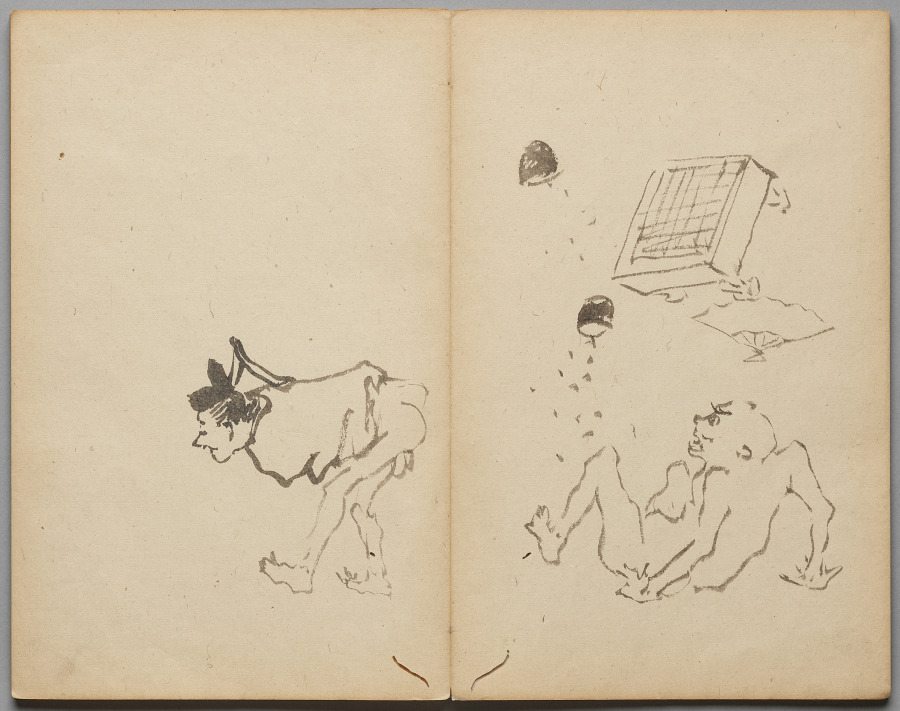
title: Farting Upsets a Game of Go from Sketch Album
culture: Japan, Edo period (1615–1868) to Meiji period (1868–1912)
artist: Kawanabe Kyōsai (Japanese, 1831–1889)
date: mid- to late 1800s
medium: Accordion-style book of 26 double-leaves; ink and color on paper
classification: Bound Volume